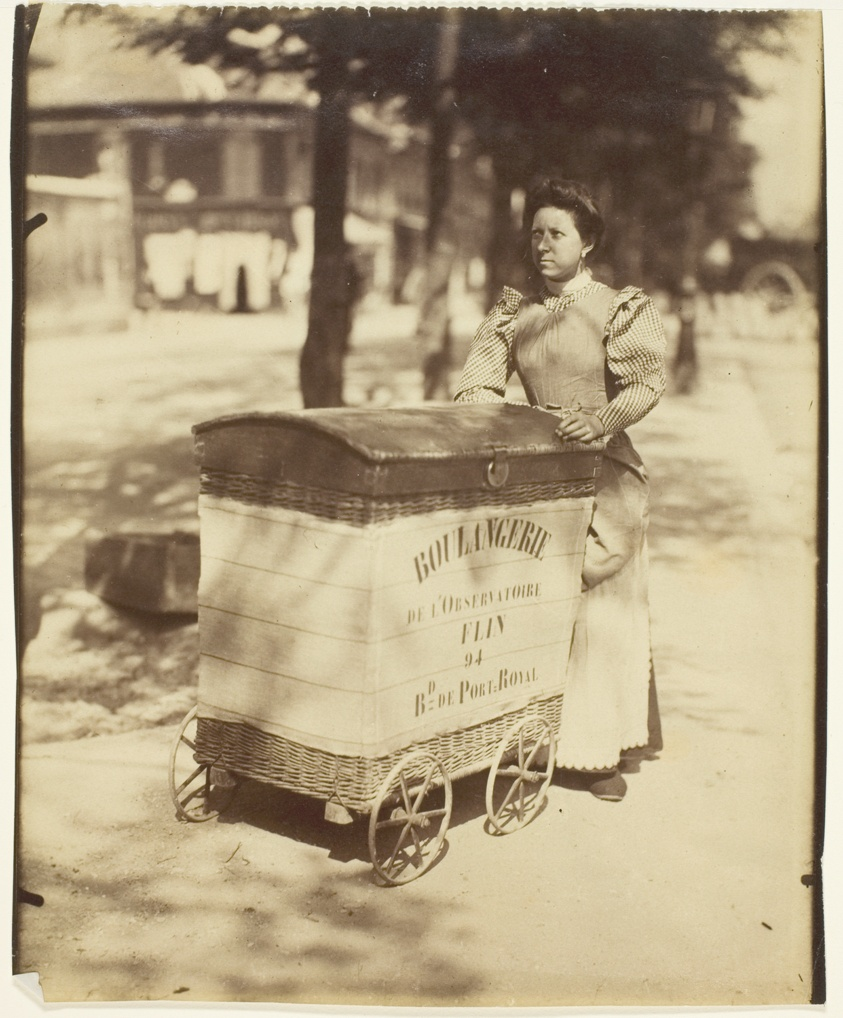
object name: Photograph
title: Porteuse de pain, from the series "Small Trades"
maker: Jean-Eugène-Auguste Atget (French, 1857–1927)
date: c. 1899/1900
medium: Albumen print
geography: Libourne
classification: albumen silver print; photographic process; photography; photograph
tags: Paris